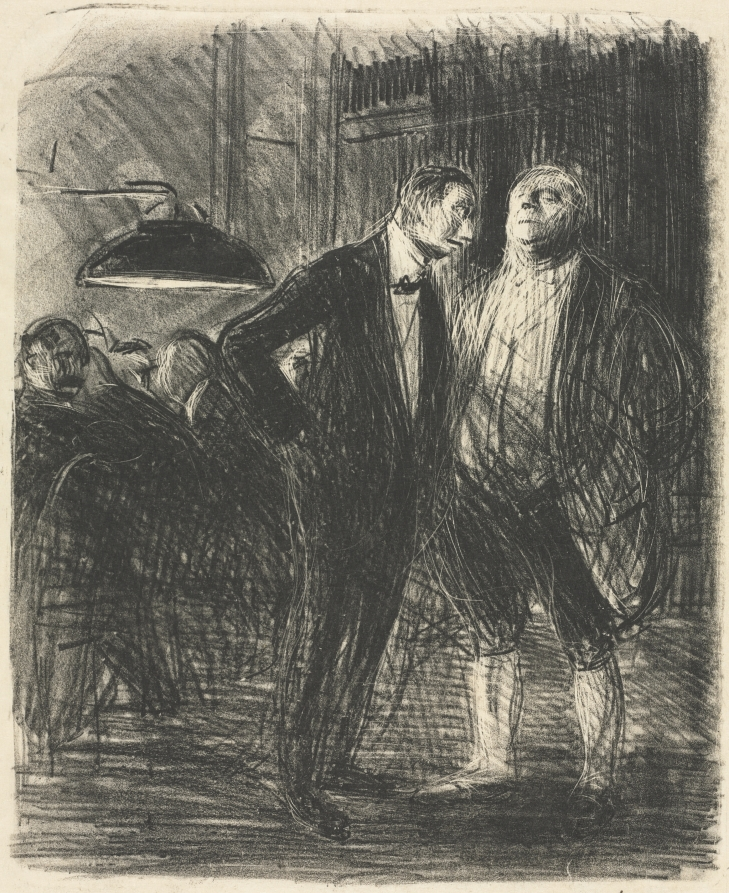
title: Le Decavé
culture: France, 19th-20th century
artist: Jean Louis Forain (French, 1852–1931)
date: c. late 1800s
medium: lithograph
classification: Print